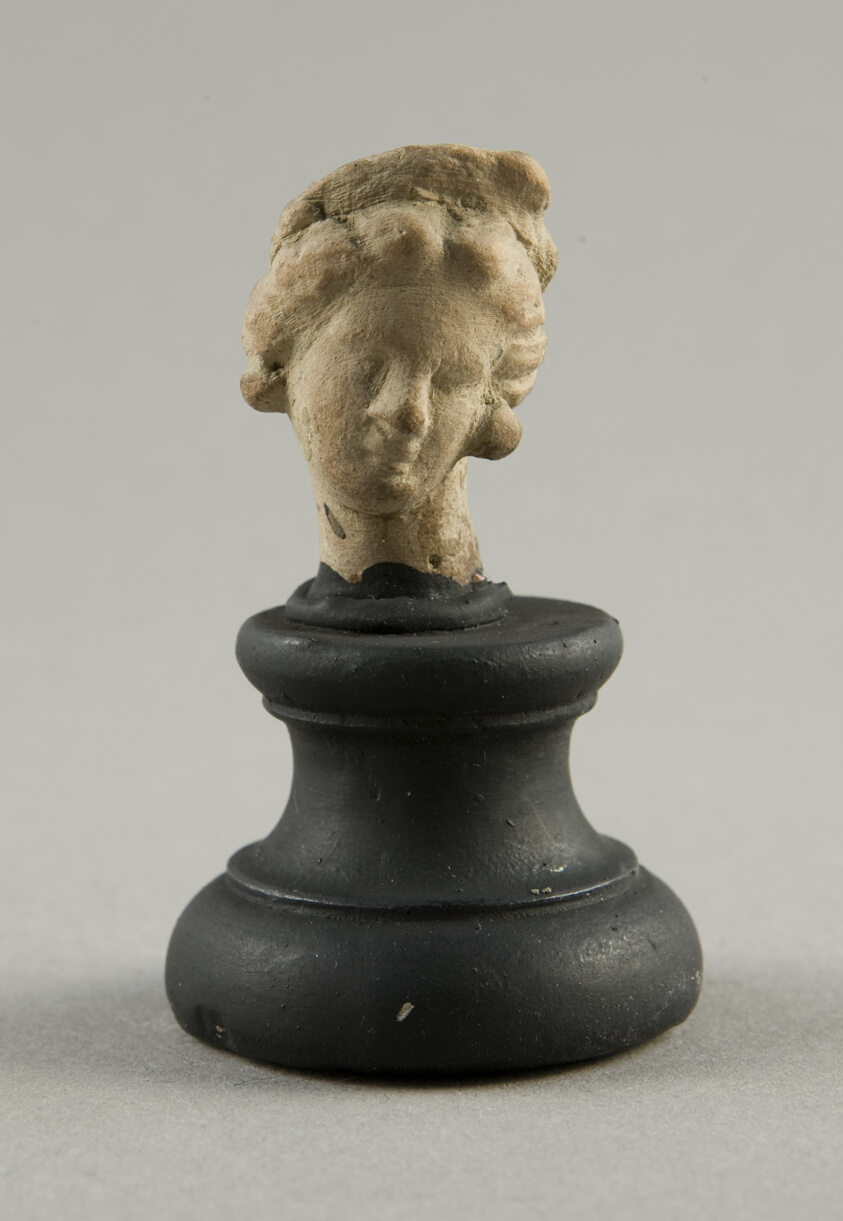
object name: Sculpture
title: Head of a Woman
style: greek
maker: Greek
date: 3rd-2nd century BCE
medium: terracotta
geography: Greece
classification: earthenware; ceramics; sculpture; ancient art